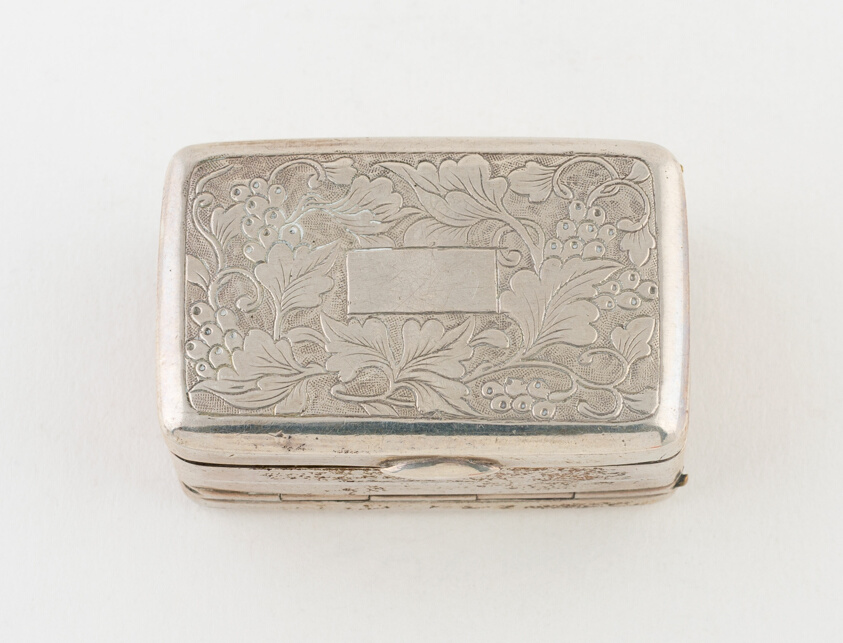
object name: Metalwork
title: Double-Sided Vinaigrette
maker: China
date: c. 1850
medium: Silver and silver gilt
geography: China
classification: container for personal use; vinaigrette (container for health care); european decorative arts; metalwork; silver; decorative object/ornament